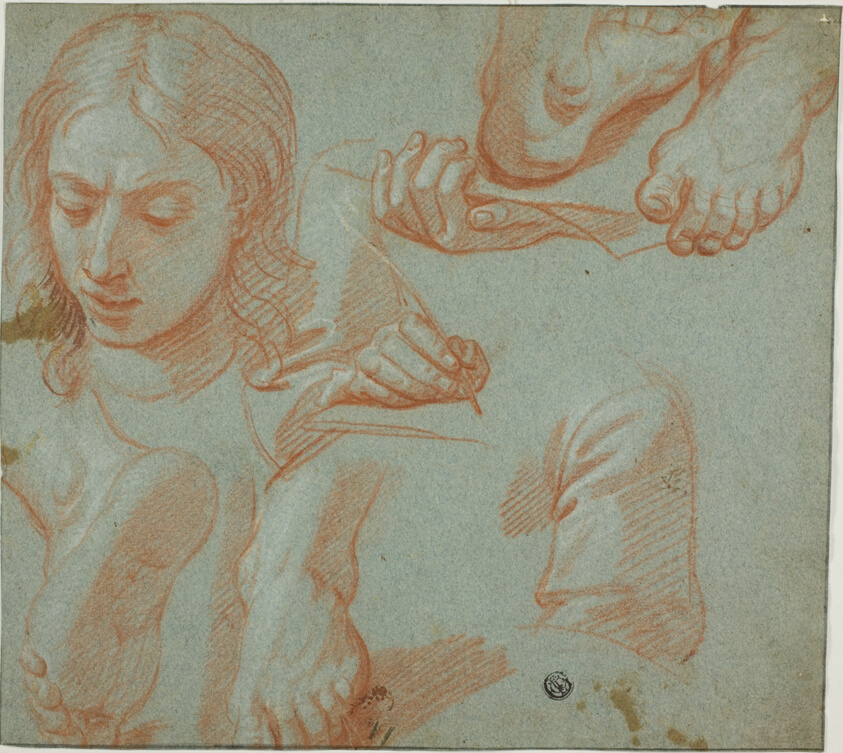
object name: Drawing and Watercolor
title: Sketches of Head, Hands, Shoulder, and Feet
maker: Style of Agostino Masucci (Italian, c. 1691-1758)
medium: Red chalk, heightened with white chalk, on blue laid paper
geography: Italy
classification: drawings (visual works); prints and drawing